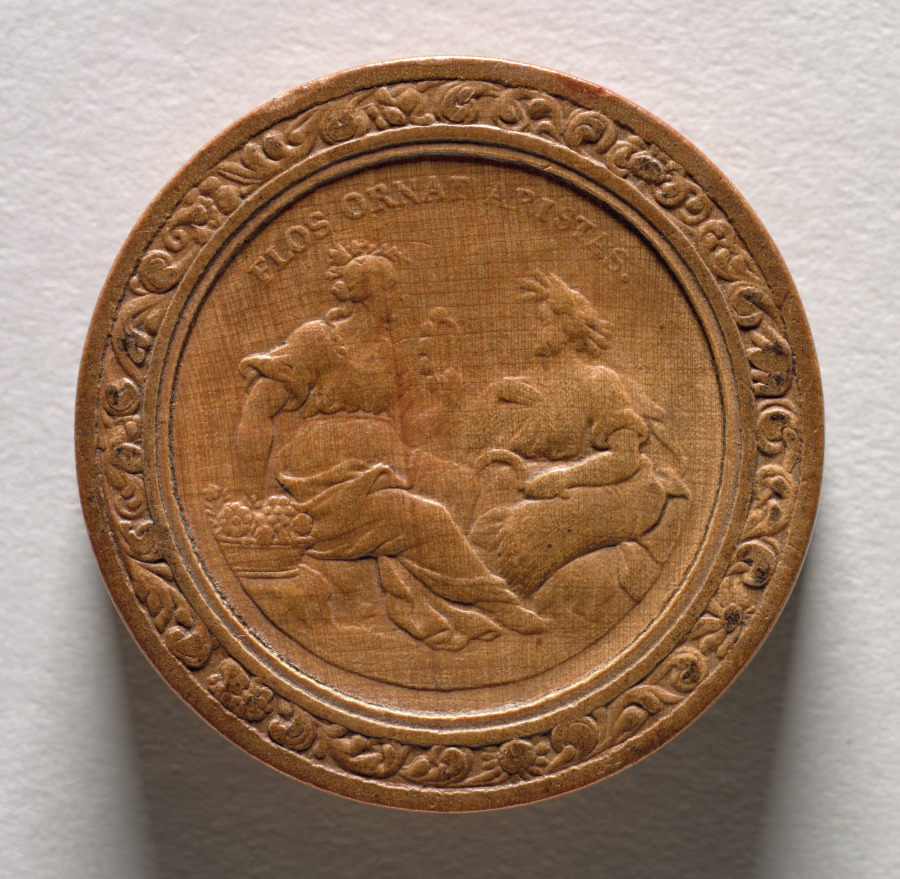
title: Gaming Piece (reverse)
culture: Germany, late 17th-early 18th Century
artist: Martin Brunner (German, 1659–1725)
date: c.1700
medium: wood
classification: Furniture and woodwork